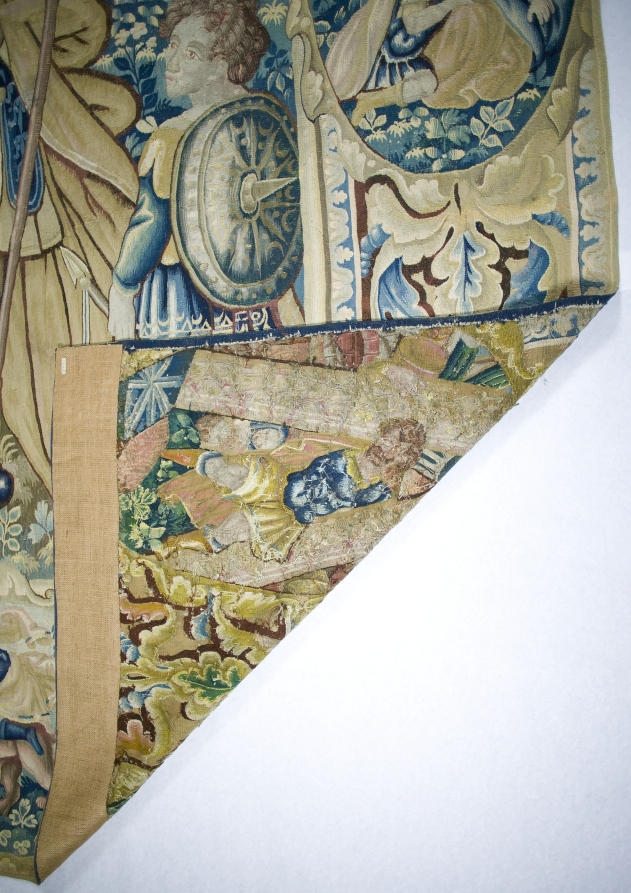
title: Gideon Selecting his Army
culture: Flanders, late 16th century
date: late 1500s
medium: tapestry weave: wool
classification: Tapestry